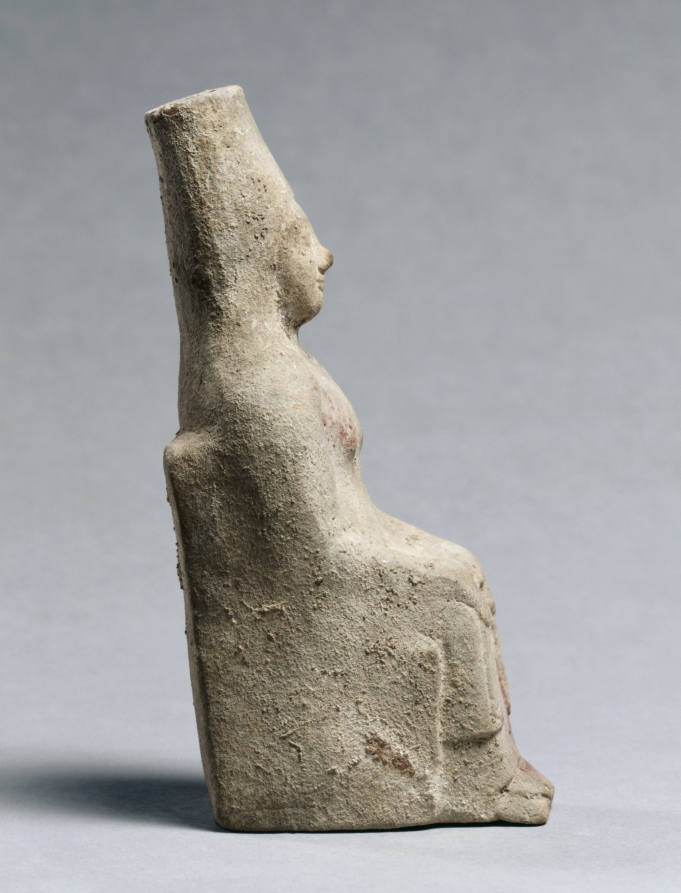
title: Seated Goddess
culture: Greece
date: 500s BCE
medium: terracotta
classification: Sculpture